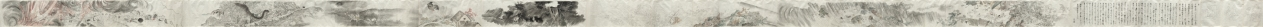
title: Sketch Copy of Natural Disasters, from the Seven Fortunes and Misfortunes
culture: Japan, Edo period (1615–1868) to Meiji period (1868–1912)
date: after 1773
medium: handscroll; ink and color on paper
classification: Painting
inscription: Signed: Gettcho; dated 1773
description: This unmounted handscroll is a copy of the first of a three-scroll set painted by Maruyama Ōkyo (1733–1795) for Buddhist monk Yujō (1723–1773). It depicts people's unfortunate encounters with forces of nature from wind to beasts. Ōkyo's realistic, contemporary imagery was meant to evoke a sense of recognition and empathy in viewers, shocking them into avoidance of possible punishments.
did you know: Notations that appear throughout the scroll indicate colors and other details of the original painting.